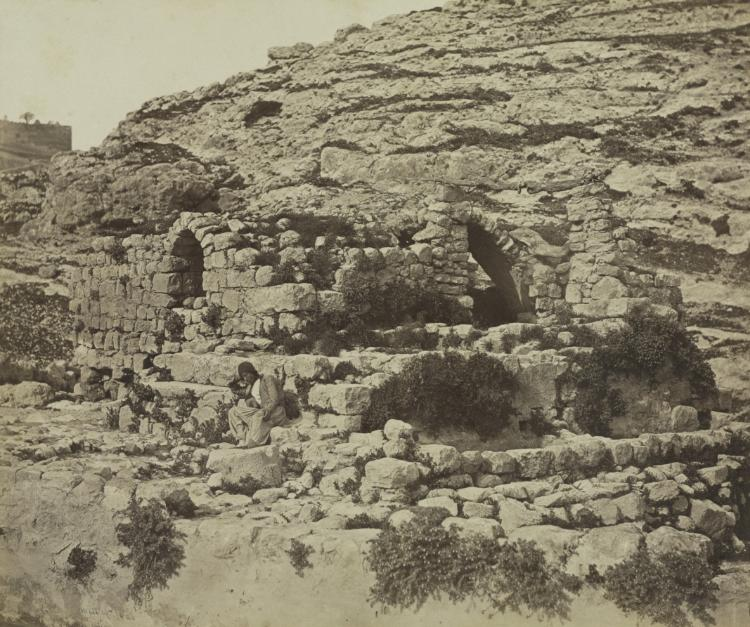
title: Well of Joab, Jerusalem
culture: England, 19th century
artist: James Robertson (British, 1813 (?)-aft 1865)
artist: Felice A. Beato (British, 1832–1909)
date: 1857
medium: salt print from wet collodion negative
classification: Photograph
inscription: written in ink on recto: "Well of Joab;" written in pencil: "M2121 /#26"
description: This charming view of the Well of Joab resulted from the pioneering photographic collaboration of James Robertson and his brother-in-law, Felice Beato, while on a trip to the Near East in 1857. Their high quality, large, beautifully executed, and carefully composed photographs are products of the first known use of the wet-collodion process in the Holy Land. The images depict the most holy places in and near Jerusalem, typically recording the sites from striking points of view, as in the lush salt print Well of Joab, Jerusalem. The camera was pointed upward, producing a three-quarter view of the well’s architectural stone ruins, which appear to merge into the rocky surface of the hilly background. In the foreground of the composition, a solitary seated figure establishes scale and instills this otherwise desolate scene with a sense of humanity. Of the Holy Land photographers, Robertson and Beato were the first to successfully integrate human figures into the surrounding scenery of their compositions.